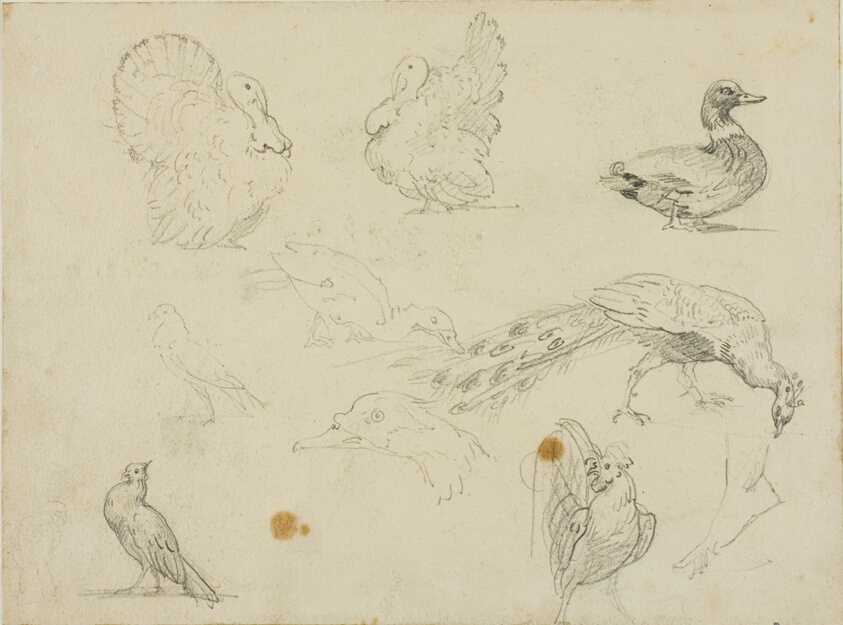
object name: Drawing and Watercolor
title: Sketches of Fowl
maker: Jean Louis André Théodore Géricault (French, 1791-1824)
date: 1813/14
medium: Graphite on cream wove paper, perimeter mounted on ivory laid paper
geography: France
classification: drawings (visual works); prints and drawing